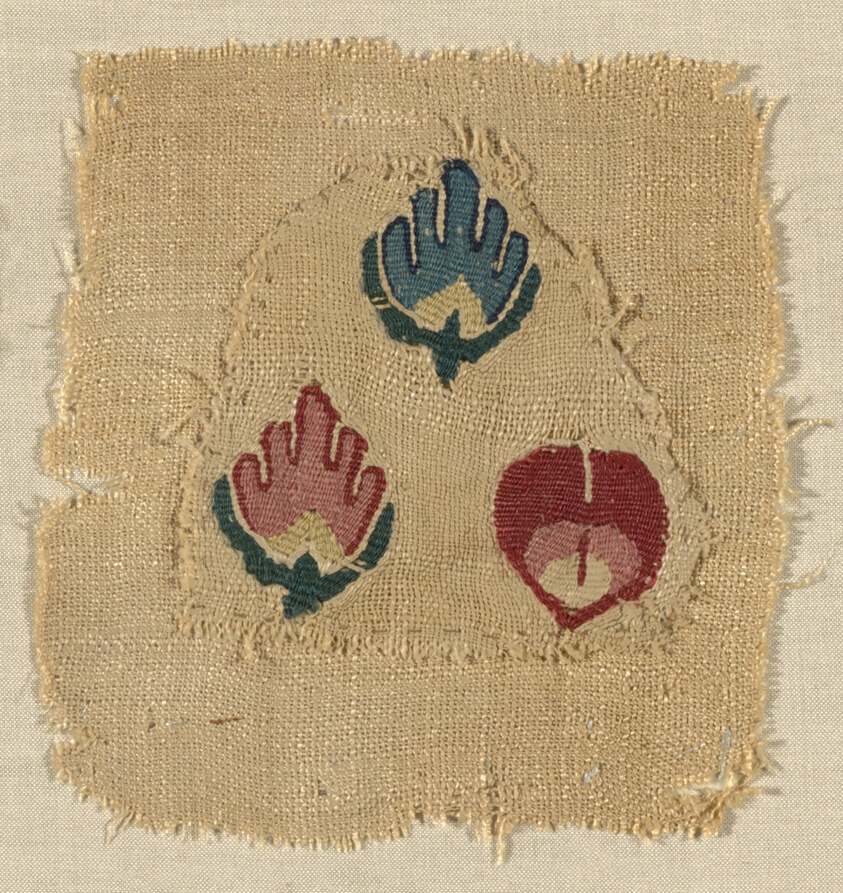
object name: Textile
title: Fragment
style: roman period (egyptian)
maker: Egypt, Akhmin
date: 5th/6th century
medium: Linen and wool, slit tapestry weave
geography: Egypt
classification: textile; weaving